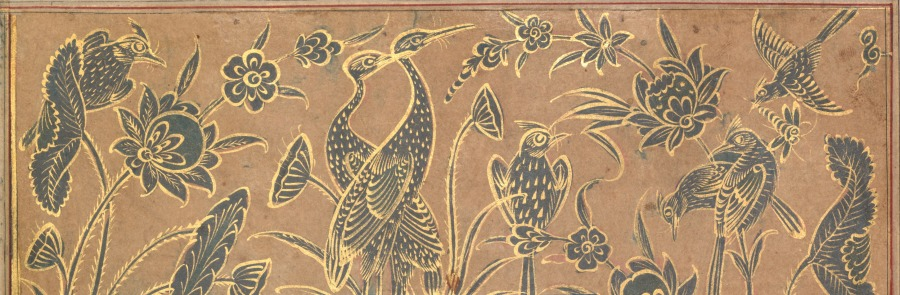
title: Page from a Panj Ganj (Five Treasures) of Abd al-Rahman Jami (Persian, 1414–1492), with two Persian masnavis: Yusuf va Zulaykha (Joseph and Zulaykha) and Subhat al-abrar (Rosary of the Righteous) (verso)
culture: Northern India, Mughal, early 17th century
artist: Mushfiq (Indian, active early 1600s)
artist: and others (Indian)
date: 1520–1607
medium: Gum tempera, ink, and gold on paper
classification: Painting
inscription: The miniature signed at upper left: ' amal - i Mushfiq sana 1015 (the work of the Mushfiq year 1015) Text on verso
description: This page is from a prized manuscript owned by one of the most respected statesmen of the imperial Mughal court, Abd al-Rahim. He served as the Khan Khanan, or vizier, the trusted minister under both Akbar and Jahangir. Abd al-Rahim was an avid book collector and patron of the arts. He acquired this book of five extended narrative poems, which included the story told in rhyme of the romance between Joseph and the Egyptian lady Zulaykha, about 80 years after its completion. The book’s illumination had not been finished, so Abd al-Rahim commissioned the exuberant decor of the borders and insets along with fullpage paintings that illustrate key scenes in the text.